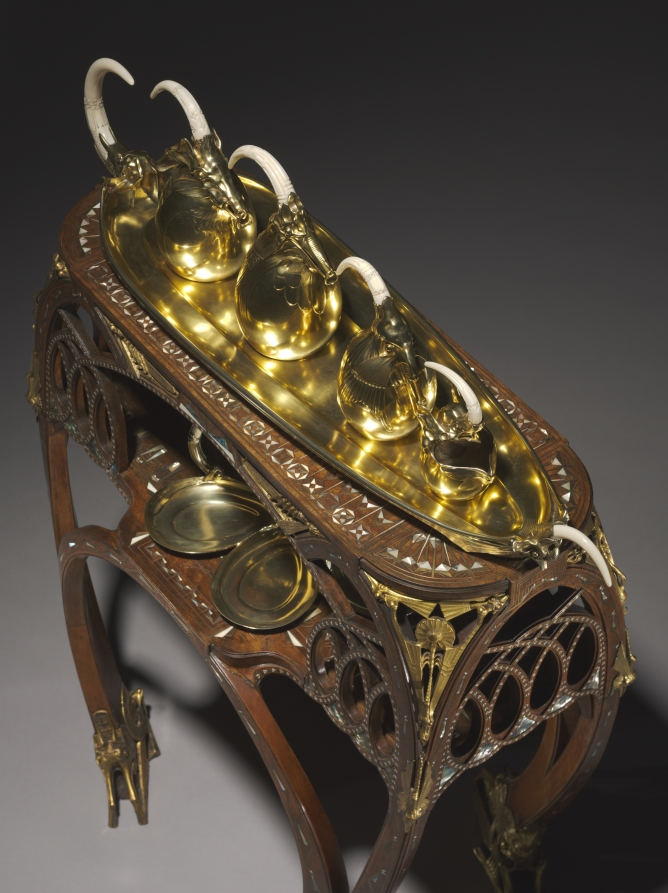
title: Salver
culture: France, Paris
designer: Carlo Bugatti (Italian, 1856–1940)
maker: Adrien-Aurélien Hebrard (French, 1866–1937)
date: c. 1907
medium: Gilt silver and ivory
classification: Silver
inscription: inscribed inside one of six ovoid compartments: "Bugatti" in ligature. Engraved on back: A.A. HEBRAND/ 8 RUE ROYAL/PARIS FRANCE.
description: This tea and coffee service, salver, and table, together with some now missing cups, were all designed by Carlo Bugatti as an ensemble and presented at the 1902 exposition devoted to decorative arts in Turin, Italy. The set was probably acquired from Bugatti's 1907 exhibition at the Galerie Hébrard in Paris by a wealthy South African widow, Anna Blake, who was living there at the time. Some of the animal and insect motifs suggest mythical beasts or the fossils of prehistoric animals. When Mrs. Blake returned to Cape Town, she took these and other pieces designed by Bugatti with her, and they remained in South Africa throughout her lifetime.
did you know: Carlo Bugatti's sons achieved illustrious careers of their own. Rembrandt Bugatti (1884-1916) became a celebrated sculptor, and Ettore Bugatti (1881-1947) manufactured luxurious automobiles and racing cars.